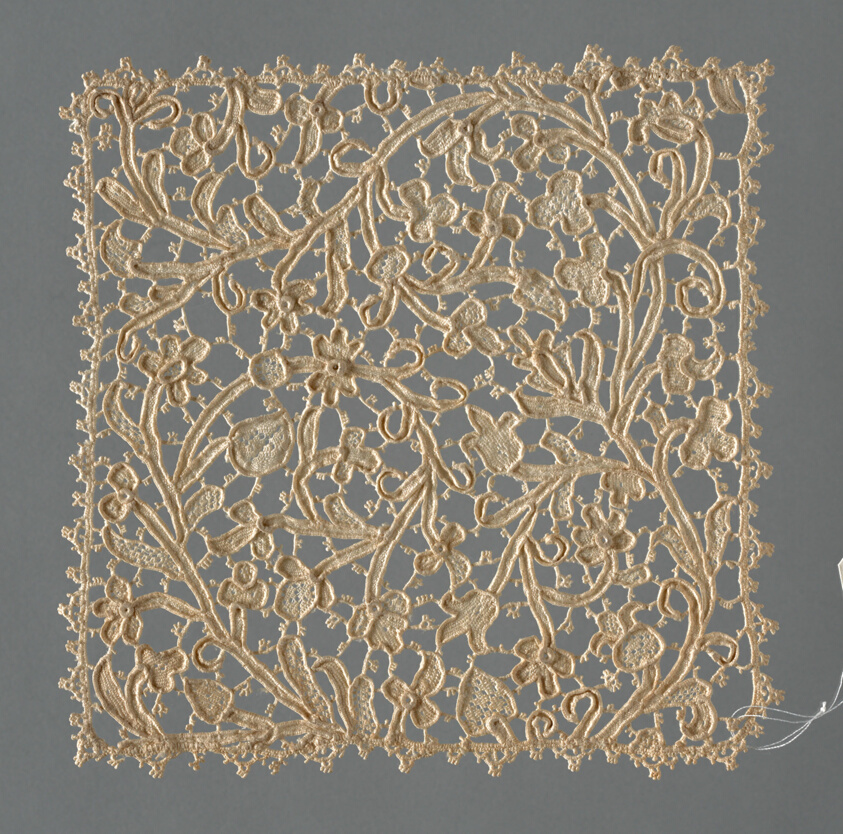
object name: Textile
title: Chalice Cover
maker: Possibly Italy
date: 1667/1700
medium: Linen, needle lace with woven tapes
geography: Italy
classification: textile; lace - mixed